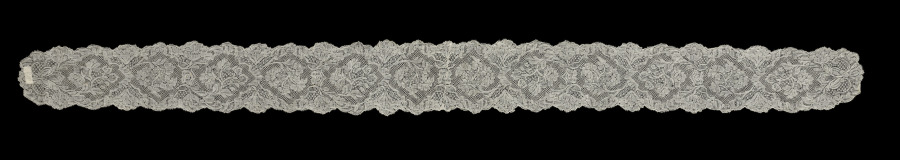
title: Lace Lappet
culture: Belgium, Binche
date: 1700s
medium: Linen: bobbin lace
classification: Lace